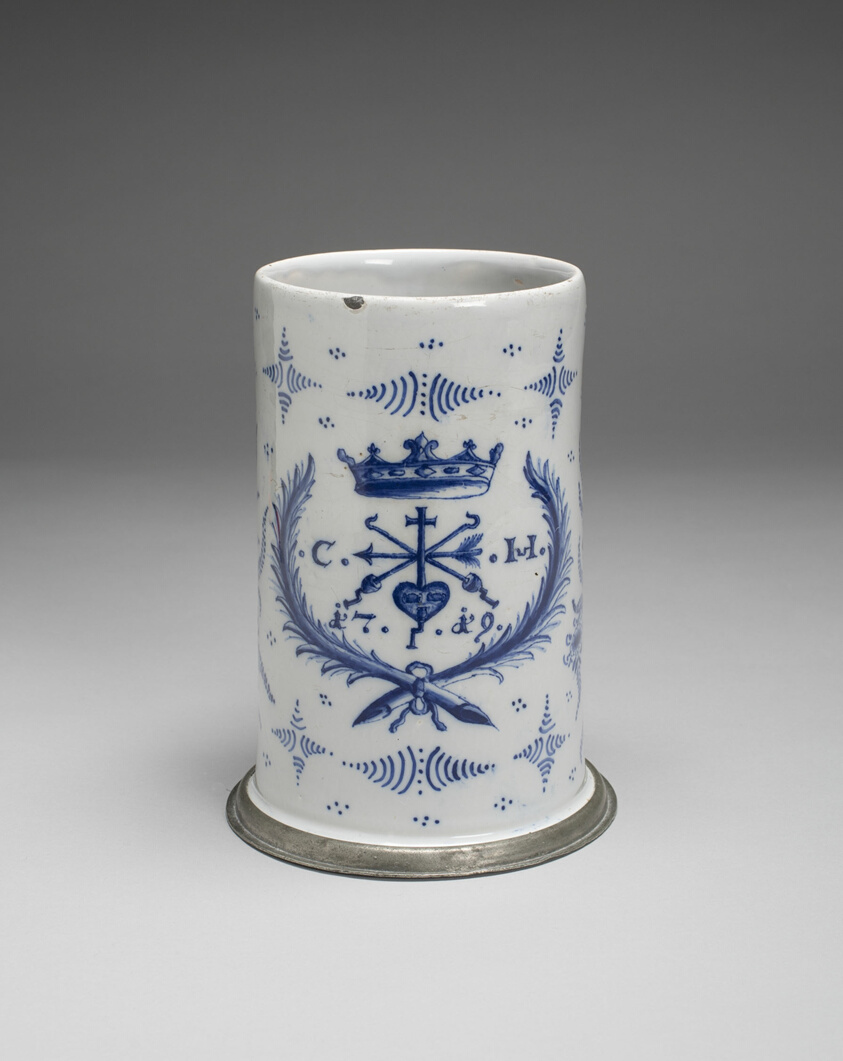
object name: Ceramics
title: Mug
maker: Possibly made by Adam Schuster; German, active 18th century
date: 1719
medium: Tin-glazed earthenware, pewter mounts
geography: Germany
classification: earthenware; ceramics; european decorative arts